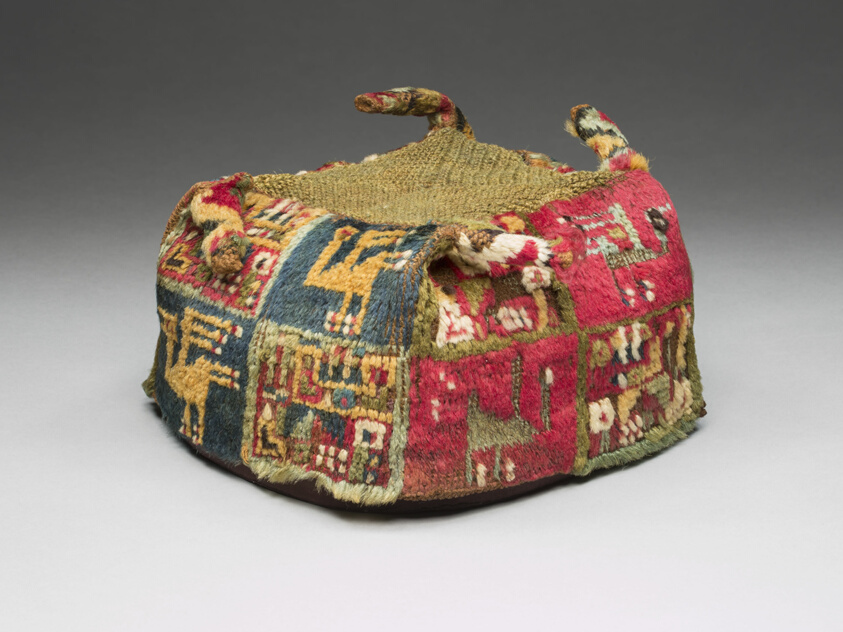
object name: Costume and Accessories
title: Hat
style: huari, early intermediate period, Pre-Columbian, americas, andes, andean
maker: Wari (Probably central or south coast, Peru)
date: A.D. 600/900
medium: Wool (camelid), square knotted ground with interworked yarns forming cut pile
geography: Peru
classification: textile; needlework (visual works)